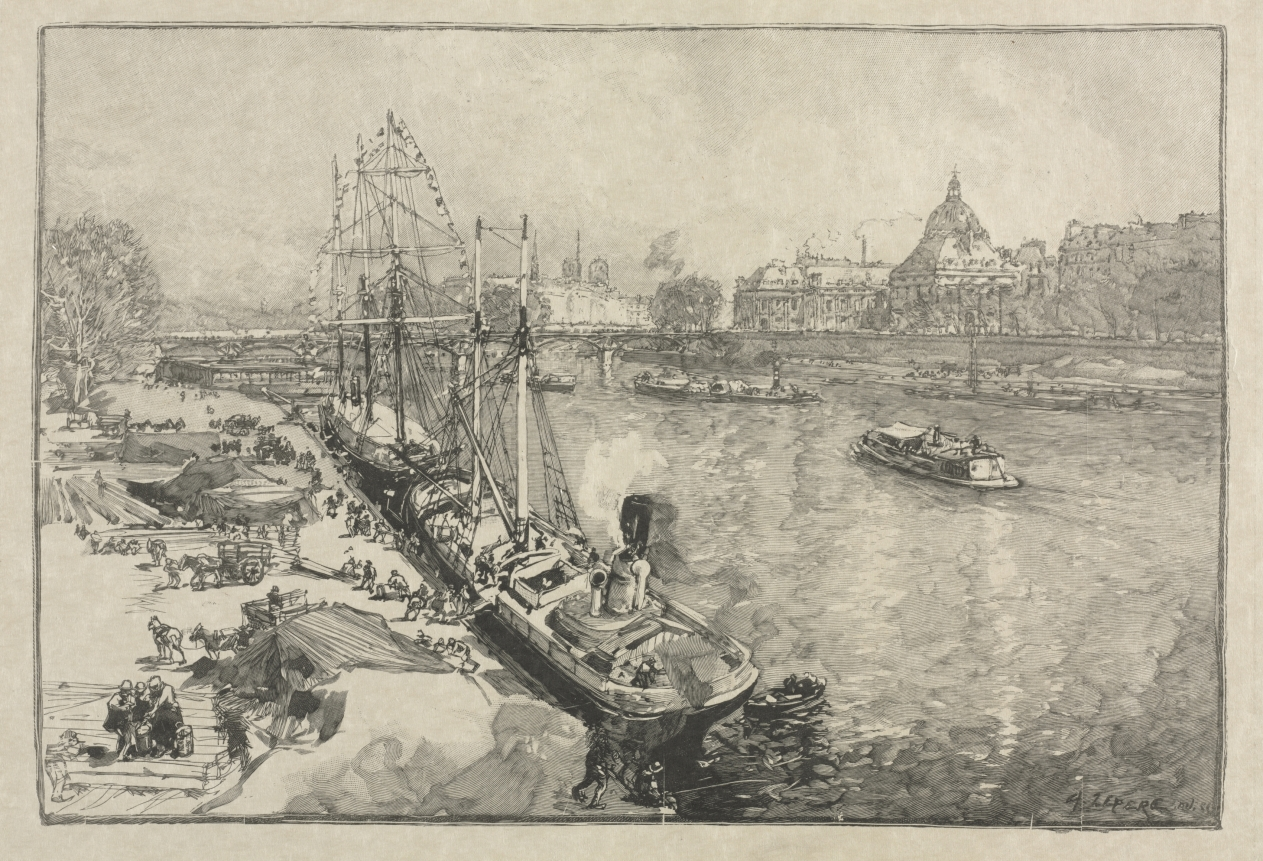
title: [Large Steamer Ship at Dock, Paris]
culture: France, 19th century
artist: Auguste Louis Lepère (French, 1849–1918)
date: c. 1870–1918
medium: wood engraving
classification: Print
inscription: lower right, in plate: A Lepere